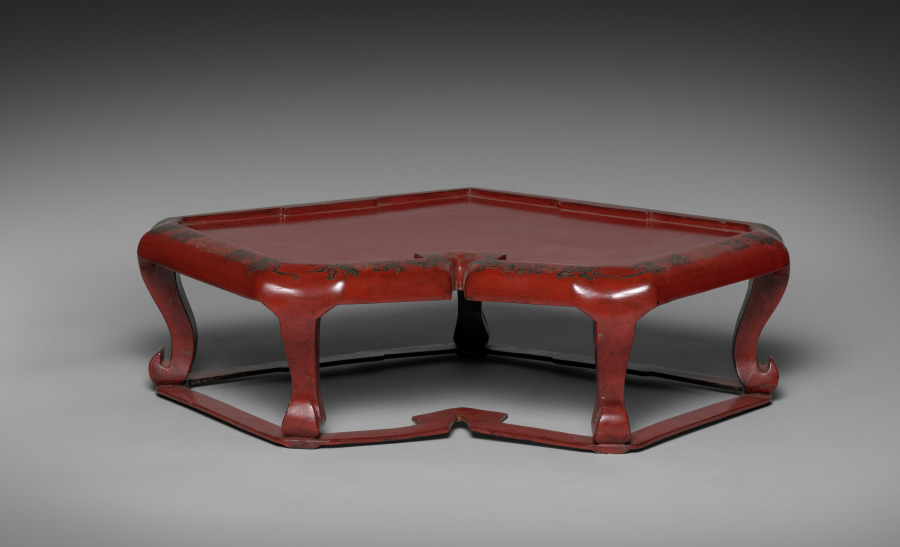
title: Stand for Tiered Boxes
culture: Japan, Edo period (1615–1868)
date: late 1700s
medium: red lacquer over a wood core, with litharge painting and engraved gold designs (Ryukyuan)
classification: Lacquer